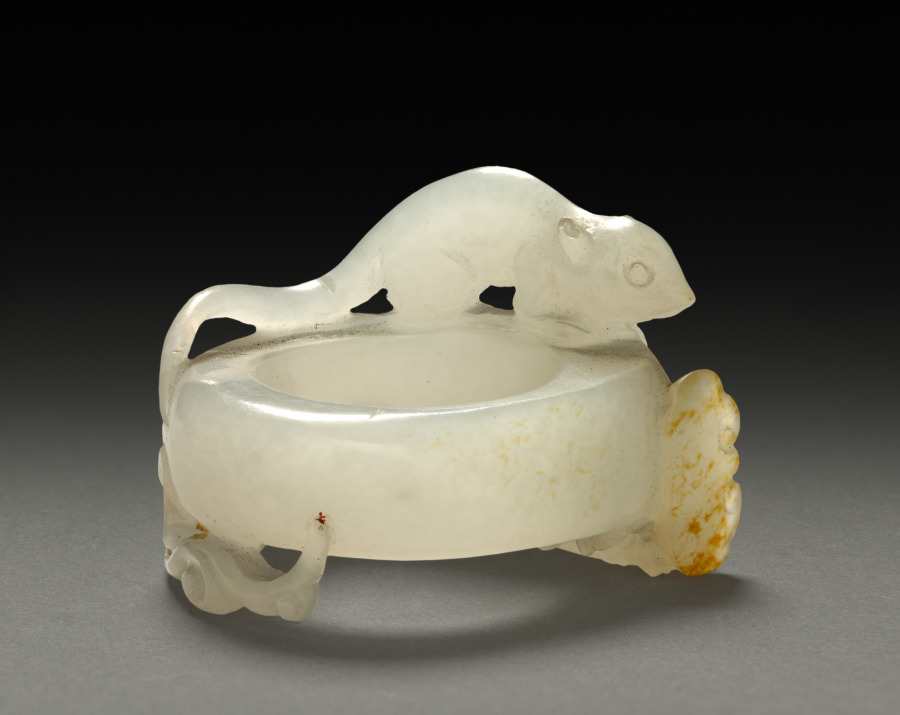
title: Thumb Ring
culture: China, Qing dynasty (1644-1911)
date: 1600s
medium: jade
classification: Jade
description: This white jade thumb ring was carved into the form of a dragon and a mouse in relief.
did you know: When polishing and shaping the white jade, the carver deliberately left the yellowish "skin" of the original rock on one section of the ring.